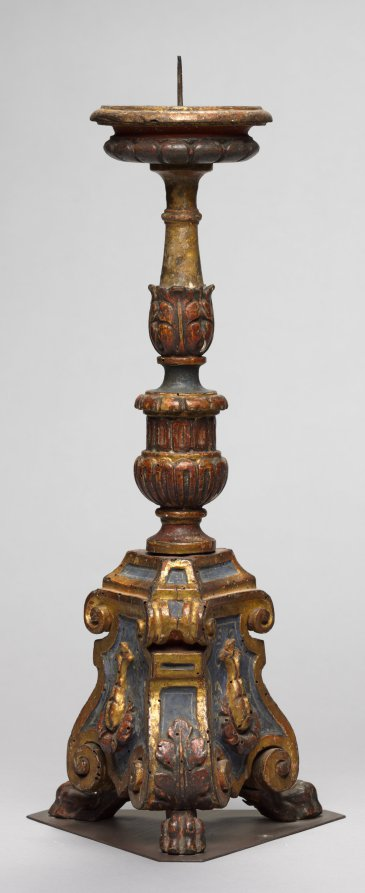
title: Candlestick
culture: Italy, probably Tuscany, late 15th century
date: late 1400s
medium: carved and gilded wood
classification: Furniture and woodwork